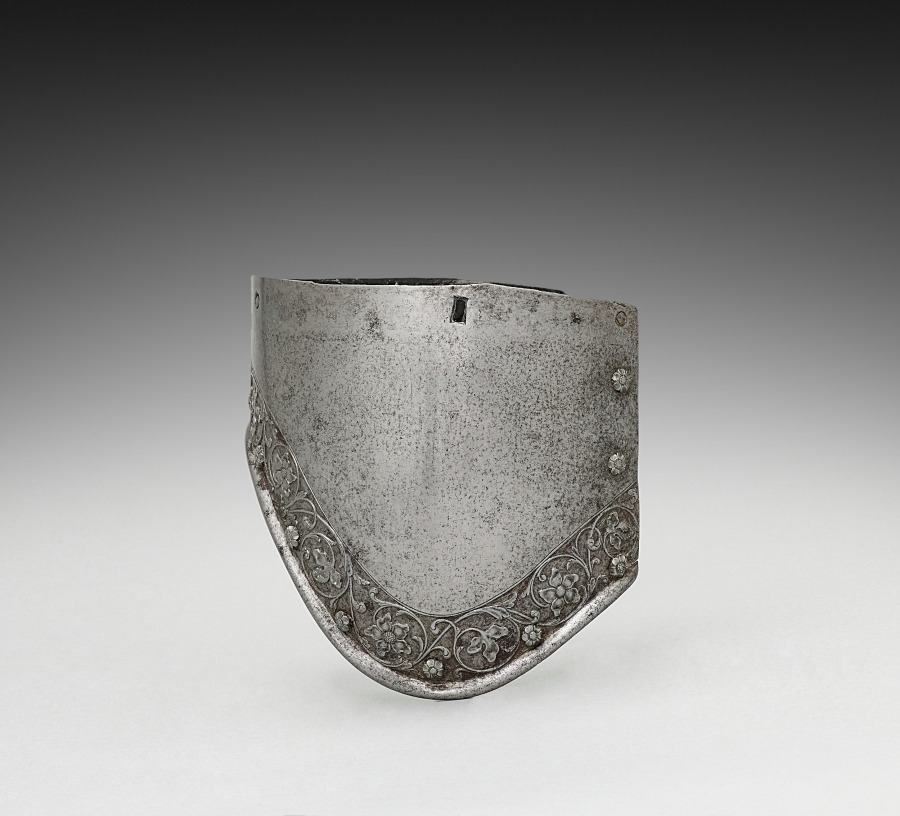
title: Upper Arm Canon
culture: Italy, Milanese Style, probably 19th century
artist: attributed to Negroli Workshop (Italian, c. 1500–1561)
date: 1800s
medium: steel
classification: Arms and Armor